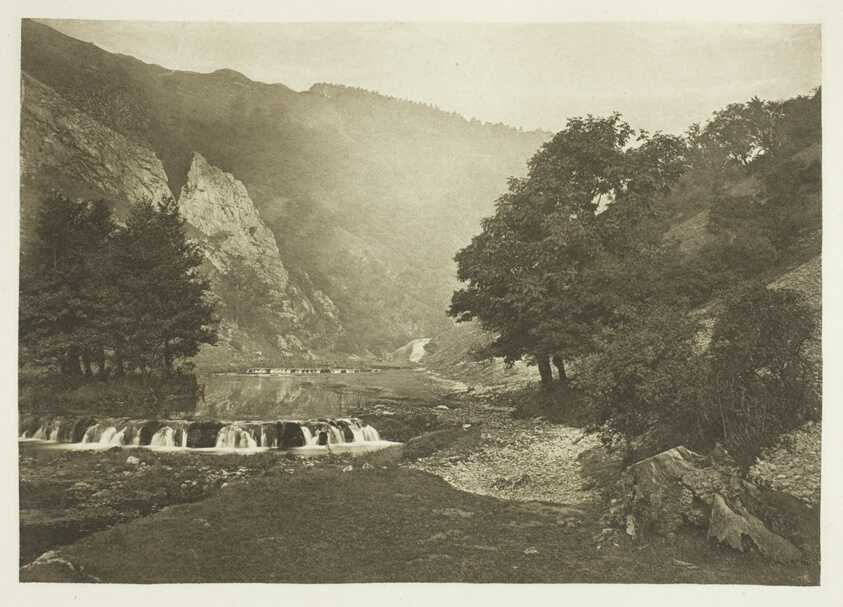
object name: Photograph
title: Entrance to Dove Dale, Derbyshire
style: 19th century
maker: Peter Henry Emerson (English, born Cuba, 1856–1936)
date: 1880s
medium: Photogravure, plate XXXVII from the album "The Compleat Angler or the Contemplative Man's Recreation, Volume II" (1888)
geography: England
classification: photogravure; photomechanical process; photography; photograph